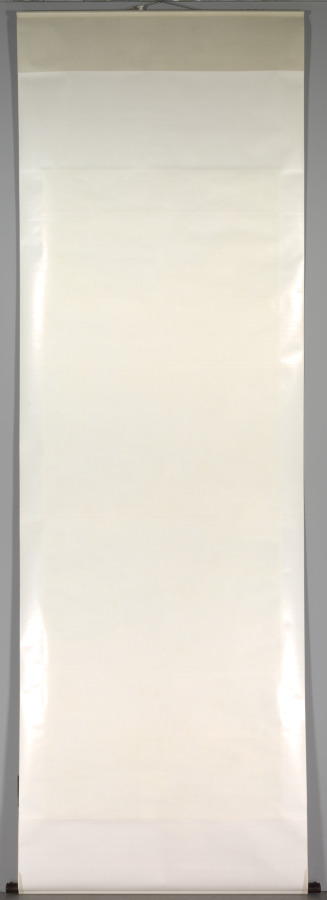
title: Yellow Chrysanthemums and Red Osmanthus in the Style of Wang Yuan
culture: China, Ming dynasty (1368–1644)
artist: Shen Zhou (Chinese, 1427–1509)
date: 1468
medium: hanging scroll, ink on paper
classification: Painting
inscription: Artist's inscription, signature, and 2 seals at upper right: Beneath the fence yellow [chrysanthemum] flowers brave the rain to blossom;/ Still others lean on the red osmanthus tree and dazzle the deep green moss./ With a goblet [of wine] I face them, entirely without concern;/ Who will answer the knocking at the gate where a guest has arrived? In the ninth month of the fourth year of the Chenghua era [1468], I followed the brush-conception of Wang Danxuan 王澹軒 [Wang Yuan 王淵] at the Youzhuzhuang 有竹庄 [House with Bamboo]. Inscribed and [painted] by Shen Zhou 沈周 of Changzhou 長洲. [seals] Shitian 石田; Shen shi Qinan 沈氏启南. trans. HR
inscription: 1 additional inscription, dated 1523, and 2 seals of Wang Chong 王寵 (1494-1533).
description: Shen Zhou, a native from Suzhou, was descended from a prominent land-owning family with strong ties to literati culture. Because Shen Zhou never entered government service, he had ample opportunity to cultivate the arts of painting, poetry, and calligraphy. Chrysanthemums and red osmanthus both bloom in autumn. The deep orange osmanthus flowers emanate a characteristically sweet fragrance. According to his inscription on the painting, Shen Zhou sought to imitate the style of the Yuan dynasty (1271–1368) painter Wang Yuan. His color-filled brushstrokes and washes, however, anticipate the flower painting style of Yun Shouping, whose Peonies are also in the Cleveland Museum of Art collection, https://www.clevelandart.org/art/1967.192. The sheer size and complex composition of this scroll are impressive.